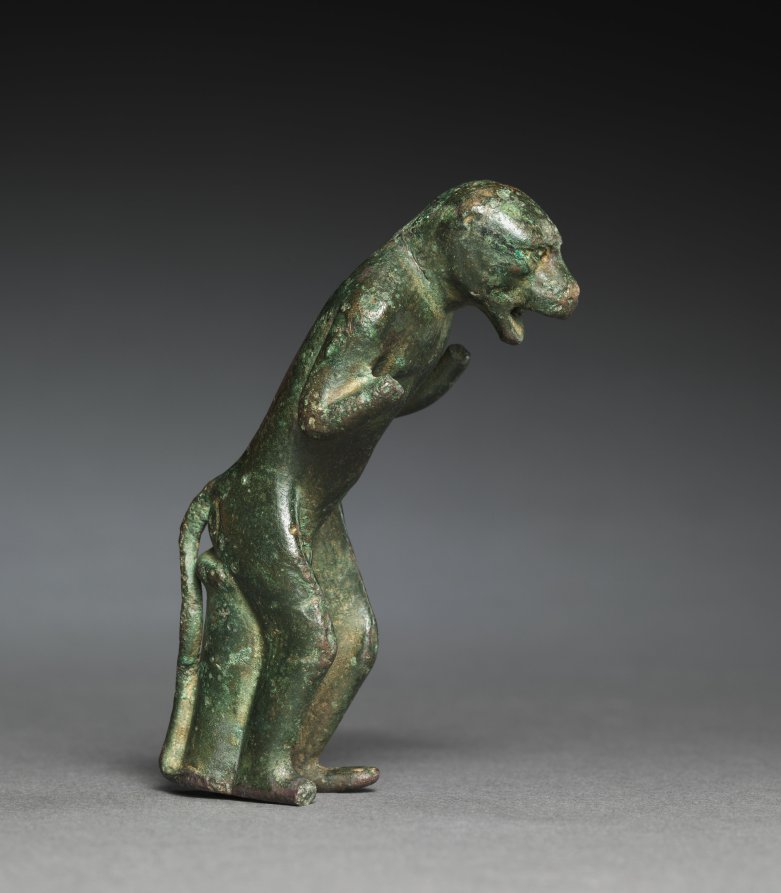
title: Baboon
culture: Egypt, Late period (715–332 BCE), Dynasty 26, Saite period (664–525 BCE)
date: 664–525 BCE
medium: bronze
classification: Sculpture